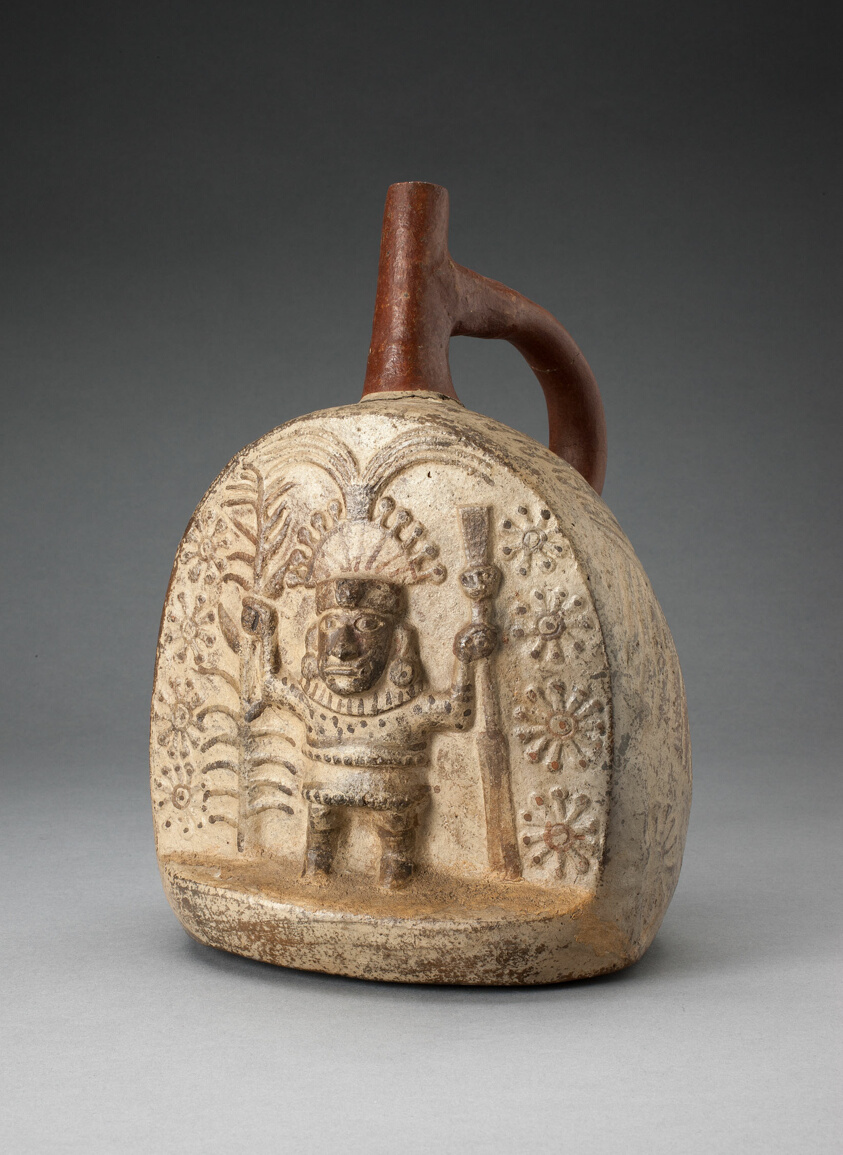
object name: Vessel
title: Handle Spout Vessel with Relief Depicting a Standing Figure, Holding Farming Tools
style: moche, mochica v, mochica, early intermediate period, Pre-Columbian, americas, Arts of the Americas, andean, andes, south american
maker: Moche (North coast, Peru)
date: 100 BCE–500 CE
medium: Ceramic and pigment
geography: Peruvian North Coast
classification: earthenware; ceramics; vessel; art of the americas